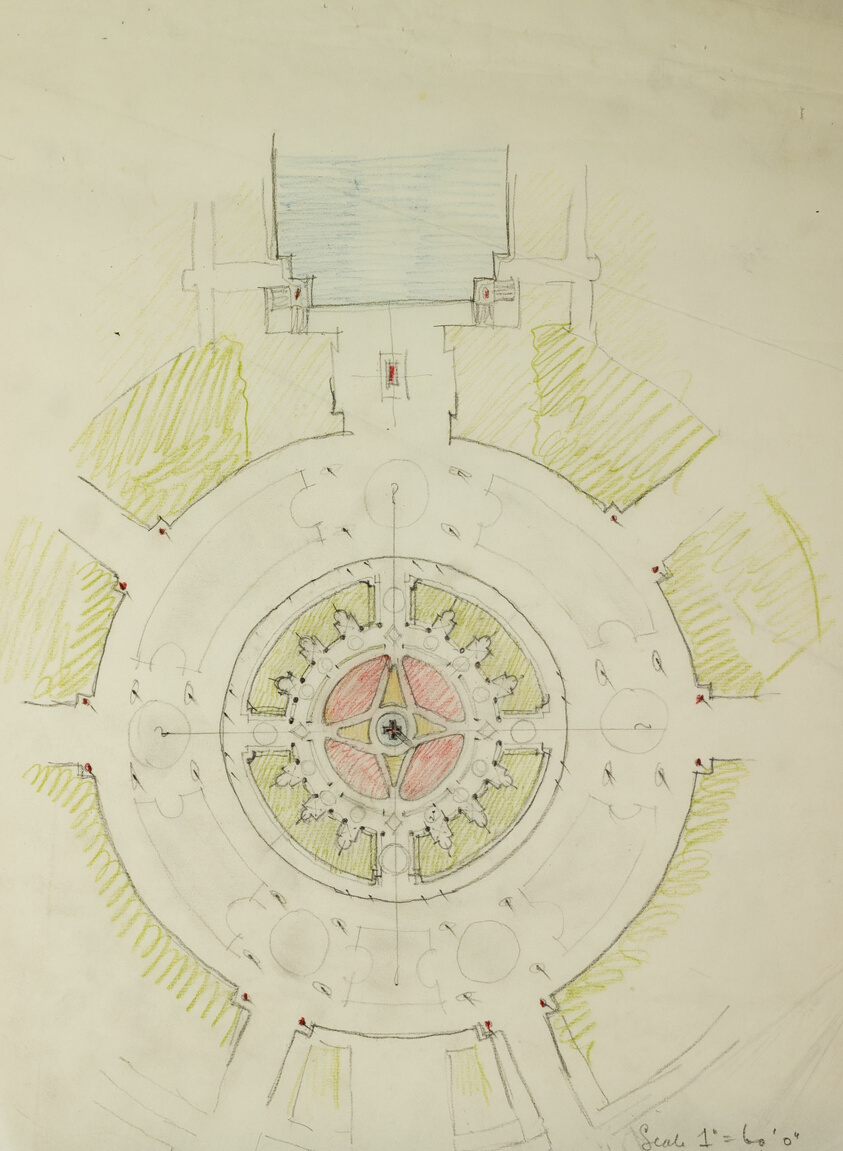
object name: Architectural Drawing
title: Potomac Round Point, Washington D.C., Plan Sketch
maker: D. H. Burnham & Co.; American, 1891-1912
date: 1909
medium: Graphite and colored pencil on tracing paper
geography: Washington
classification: design drawing; architectural drawing